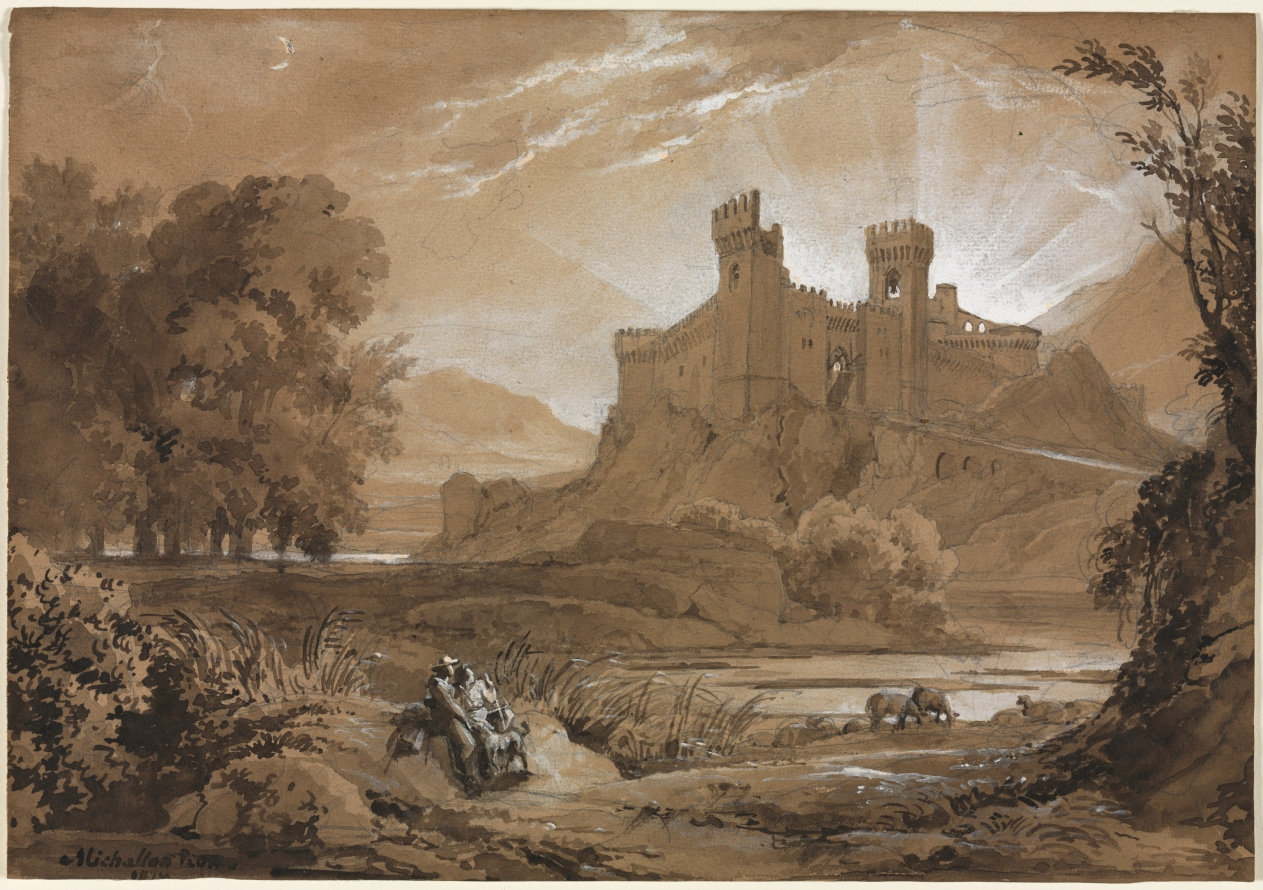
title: Landscape with Castle and Shepherds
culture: France, 19th century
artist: Achille Etna Michallon (French, 1796–1822)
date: 1814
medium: brown ink and brown wash over graphite, heightened with white gouache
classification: Drawing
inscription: signed, lower left, in brown wash: Michallon Rome / 181[9?]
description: This landscape illustrates the sublime beauty of nature, a Romantic concept, but it also reflects the importance of classical training in Rome. Throughout the 19th century, artists flocked to Italy to study classical ruins and themes, as well as landscapes. Here, the castle evokes Northern Italian fortresses, and in the tradition of other French artists traveling to Rome, Michallon imbued his rendering of the Alps with great emotion.